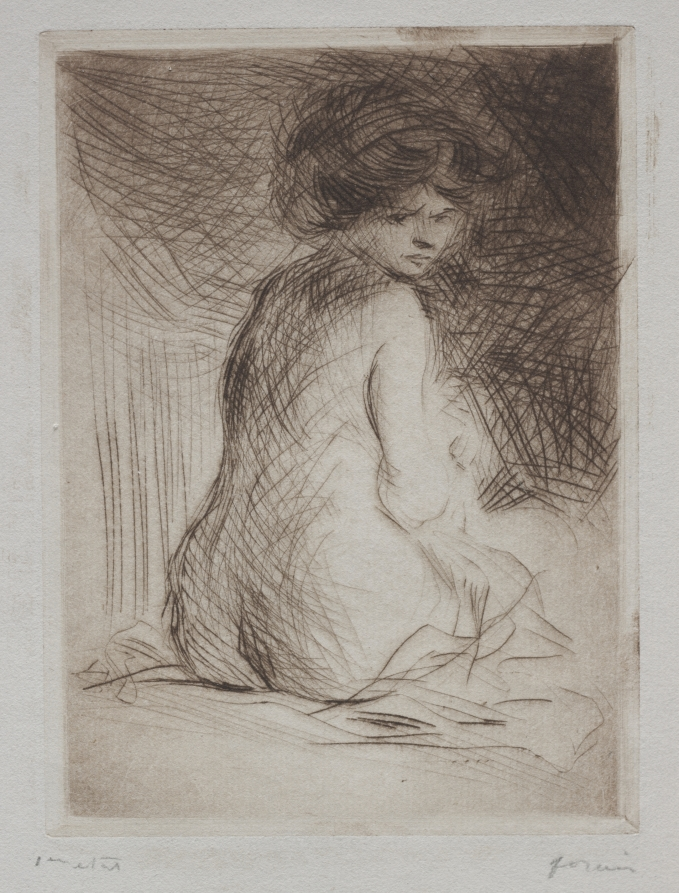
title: Seated Nude Woman from the Back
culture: France, 19th-20th century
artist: Jean Louis Forain (French, 1852–1931)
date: c. 1910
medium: drypoint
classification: Print